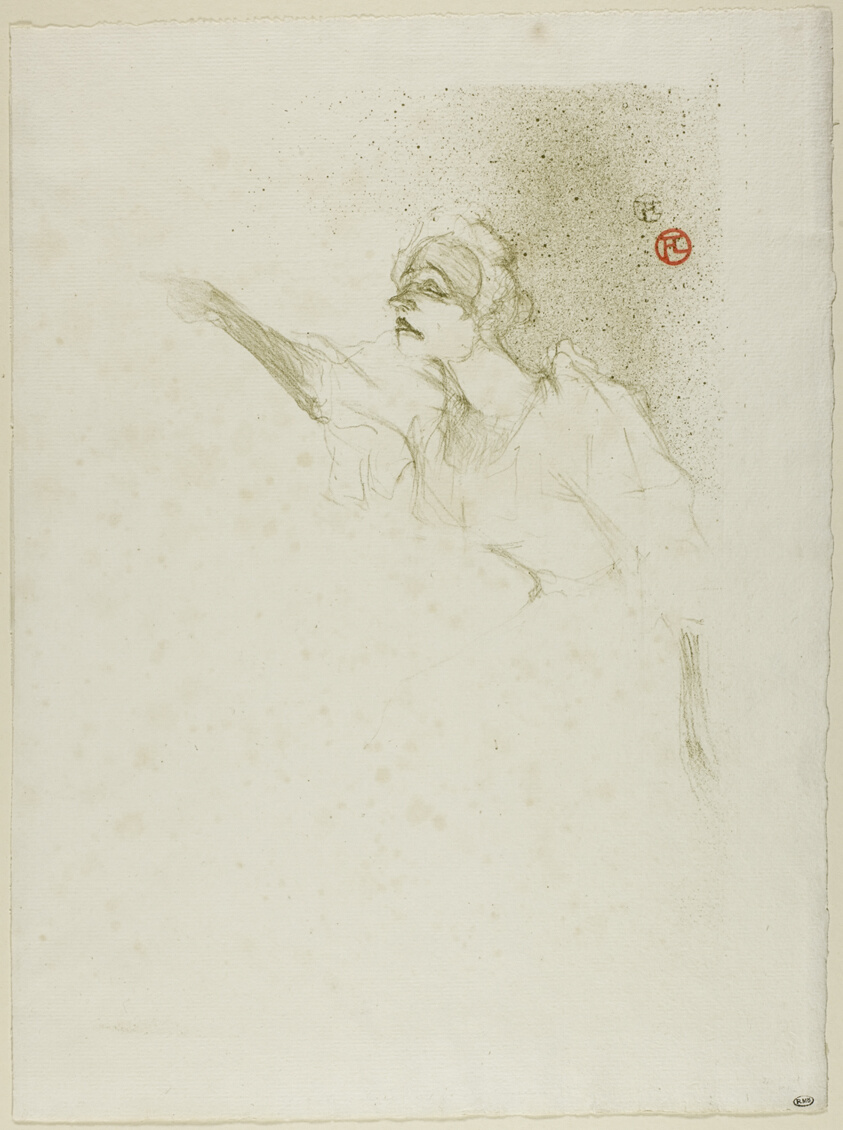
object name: Print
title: Yvette Guilbert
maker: Henri de Toulouse-Lautrec (French, 1864-1901)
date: 1894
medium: Color lithograph on ivory laid paper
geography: France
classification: lithograph; print; prints and drawing